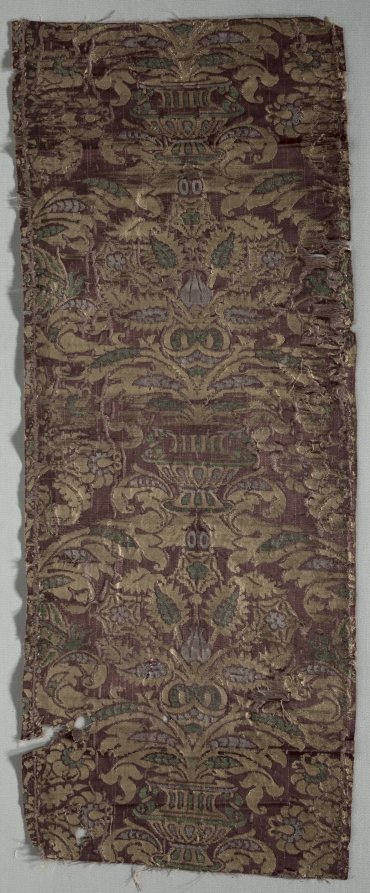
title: Brocaded Textile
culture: Italy, late 17th century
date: late 1600s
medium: brocade, silk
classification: Textile